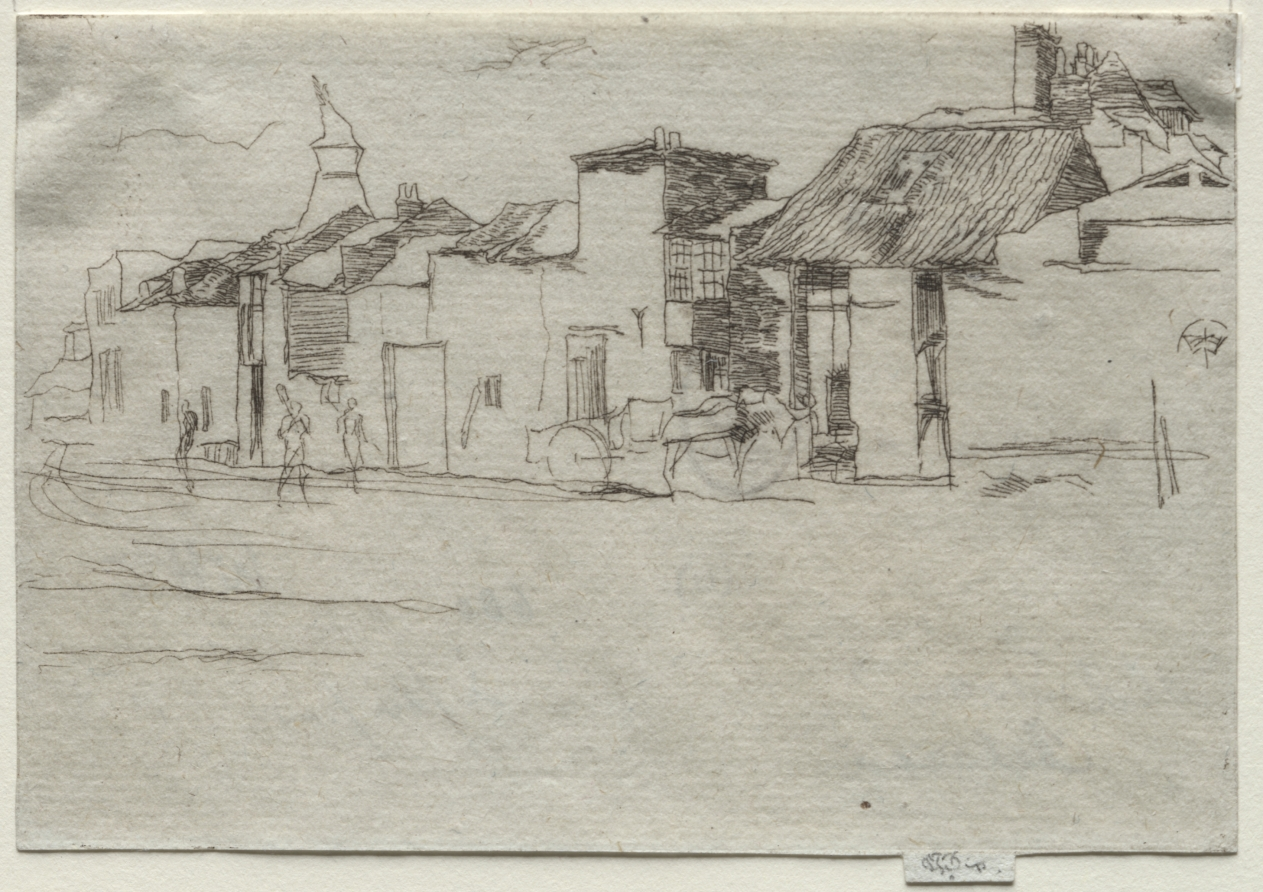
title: The Swan, Chelsea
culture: America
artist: James McNeill Whistler (American, 1834–1903)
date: c. 1870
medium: etching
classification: Print